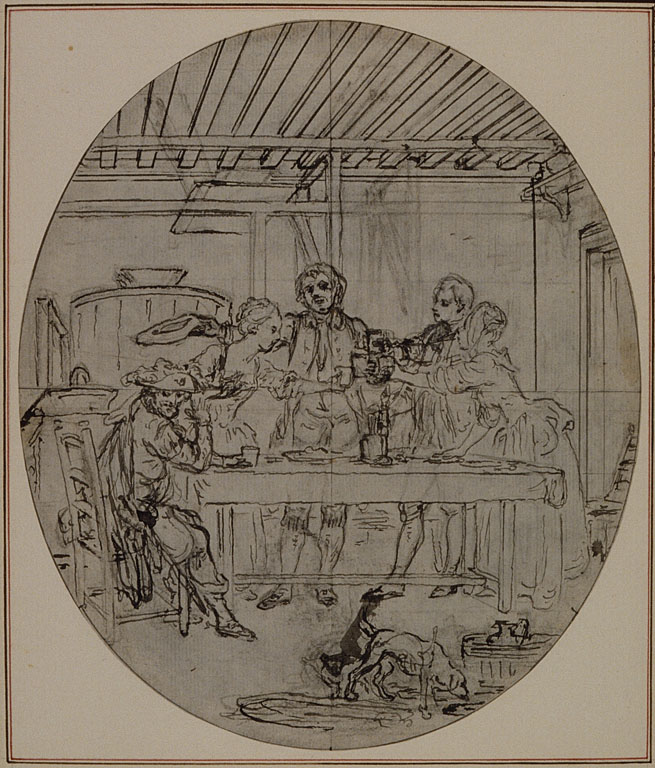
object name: Drawing and Watercolor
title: Study for a second edition, never published, of Colle's "La Partie de Chasse de Henri IV", Act III, Scene 10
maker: Hubert François Gravelot (French, 1699-1773)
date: before 1766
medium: Pen and black ink, over black chalk, on oval- shaped gray laid paper, incised for transfer and perimeter mounted on ivory laid paper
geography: France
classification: pen and ink drawings; drawings (visual works); prints and drawing